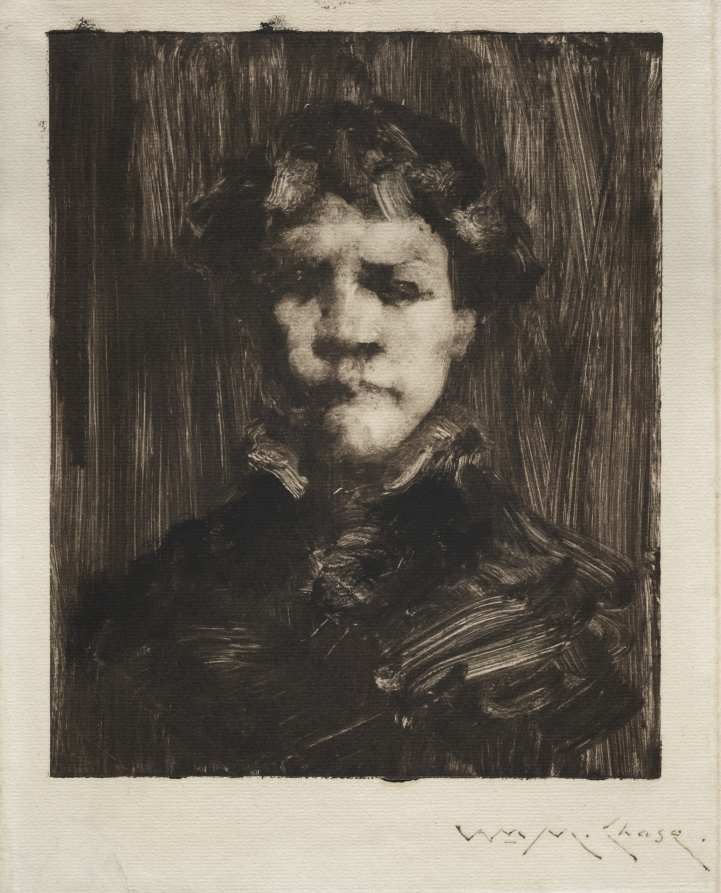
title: Head of a Boy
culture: America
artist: William Merritt Chase (American, 1849–1916)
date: c. 1878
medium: monotype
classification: Print